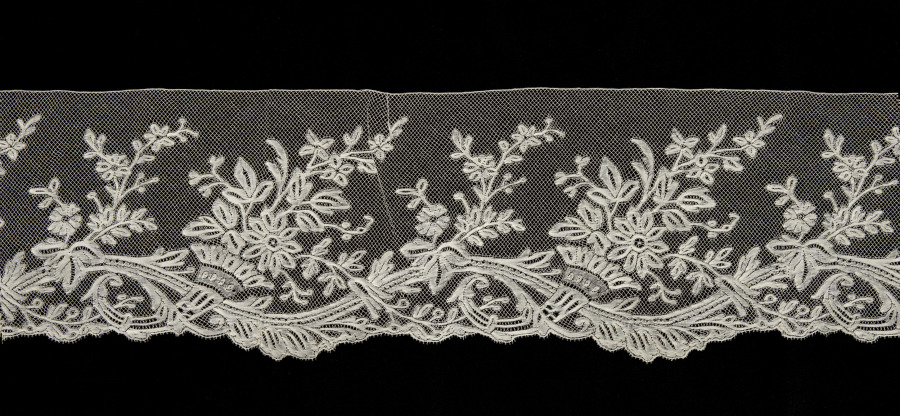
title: Lace Edging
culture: France, Valenciennes or Flanders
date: 1900–1935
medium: Linen: bobbin lace (Valenciennes)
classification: Lace